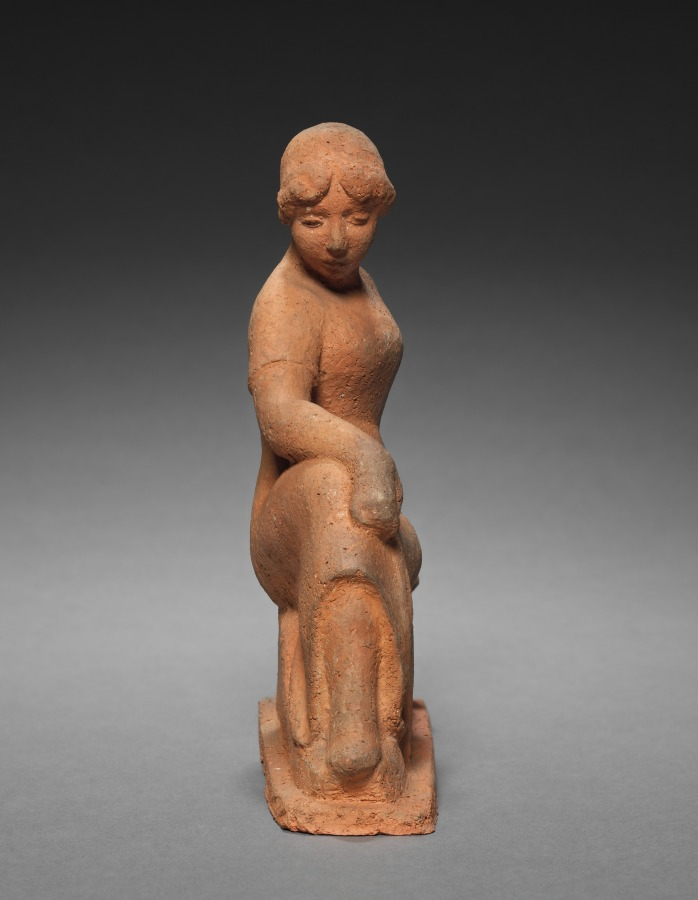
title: Seated Woman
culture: France, 20th century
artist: Aristide Maillol (French, 1861–1944)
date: c. 1900 – 1944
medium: terracotta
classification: Sculpture